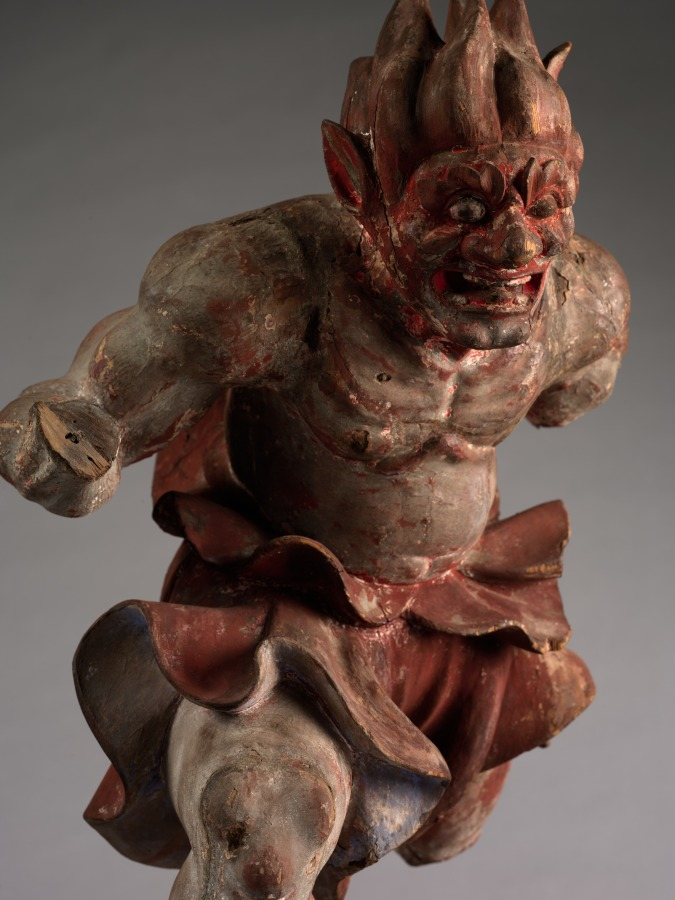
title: Thunder God (Raijin)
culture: Japan, Kamakura period (1185–1333)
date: 1300s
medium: wood with traces of gesso and red and black pigment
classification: Sculpture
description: The Thunder (Raijin) and Wind (Fujin) gods first appeared in early Buddhist art in China and Japan and were based on the popular imagery in India that was derived from the life of the historical Buddha, Shakyamuni. They were shown among a group of demon-monsters flying through the sky above the meditating Shakyamuni in an attempt to frighten away his concentration. Raijin is surrounded by a ring of small drums struck by a stick held in his hand so that he is always accompanied by a thunderous noise. A metal clasp protruding from this sculptures' back indicates that a ring of drums was once attached to the Cleveland Raijin. The matching sculpture, Fujin, is in the Fukuoka Art Museum in Japan.